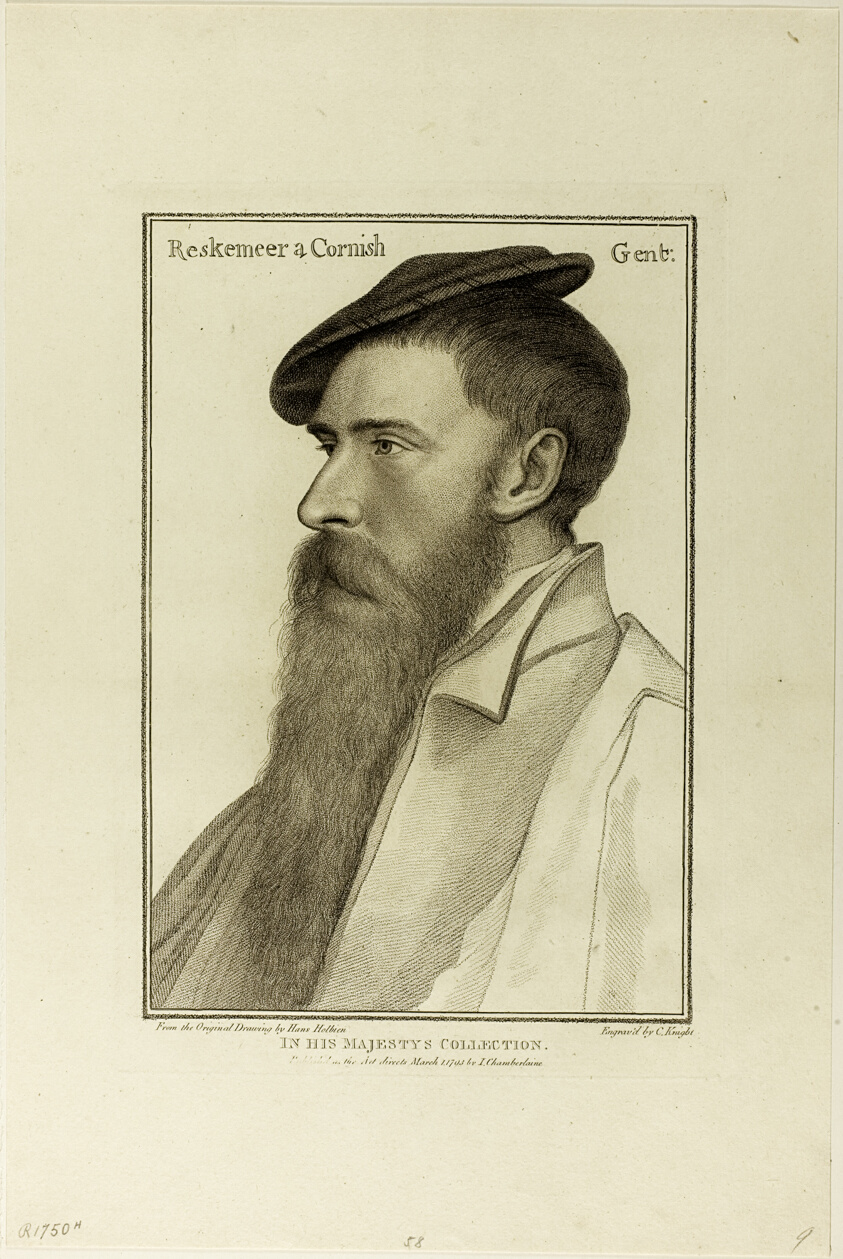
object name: Print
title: Reskimer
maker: Francesco Bartolozzi (Italian, 1727-1815); after Hans Holbein the younger (German, 1497-1543)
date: March 1, 1793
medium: Stipple engraving on cream wove paper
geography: Italy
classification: engraving; print; prints and drawing